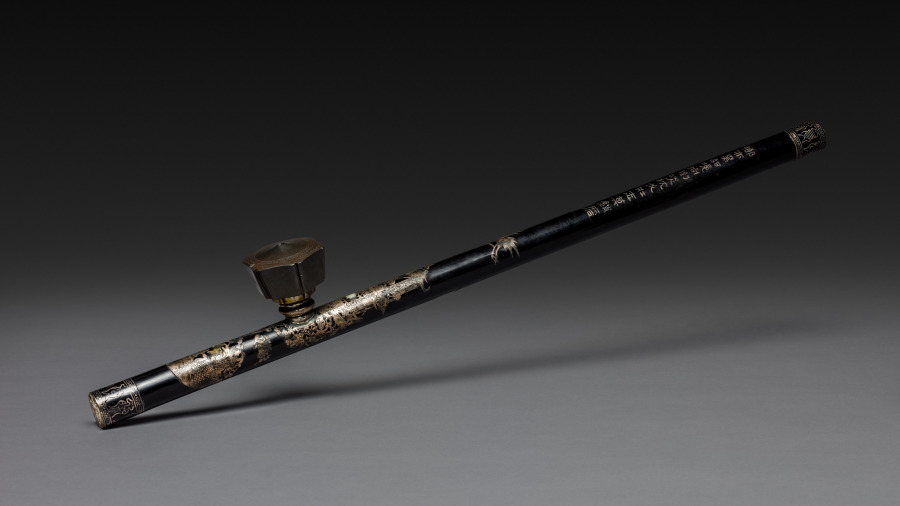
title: Opium Pipe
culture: China, Qing dynasty (1644-1911)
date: 1800s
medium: lacquer with silver decoration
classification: Miscellaneous